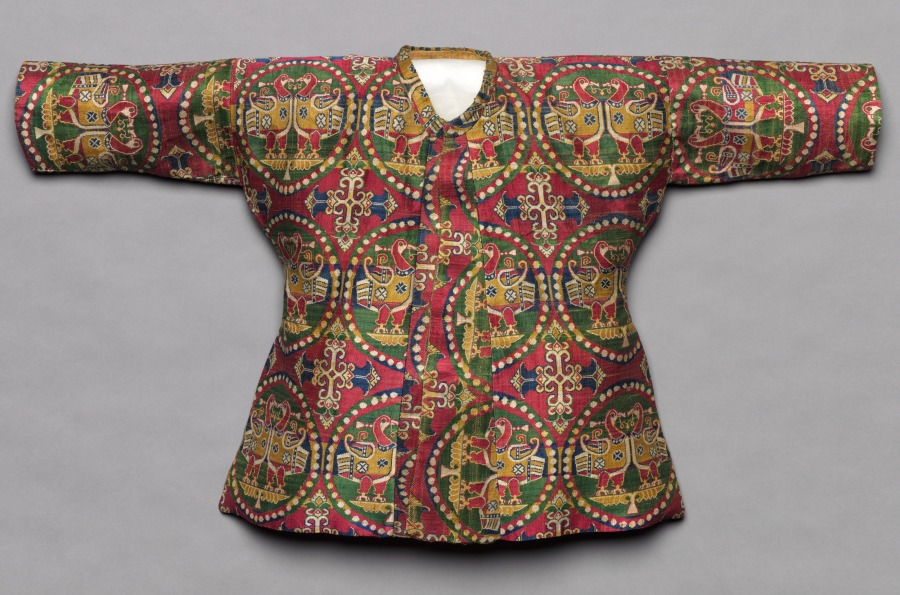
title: Child’s Coat with Ducks in Pearl Medallions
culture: Probably Sogdia (present-day Uzbekistan); China, Tang dynasty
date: 700s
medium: Silk: weft-faced compound twill weave (samite)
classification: Garment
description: The coat’s outer fabric is woven in five brilliant colors featuring paired ducks in pearl roundels, hallmarks of the precious and highly desired silks from Sogdia. The coat’s inner lining is a twill damask with a floral pattern made in China. The combination of Sogdian and Chinese silks in one garment with Tibetan ownership history is evidence of the vital exchange and cultural interaction among the peoples living along the trade routes of the Silk Road. This precious coat was presumably made for a Tibetan prince. Given the coat’s pristine condition, though, it is unclear whether the garment was ever worn, or was used as a diplomatic gift or perhaps as currency.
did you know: This coat is part of a set of garments that originally included an outer pair of pants and silk boots made from the same fabric.